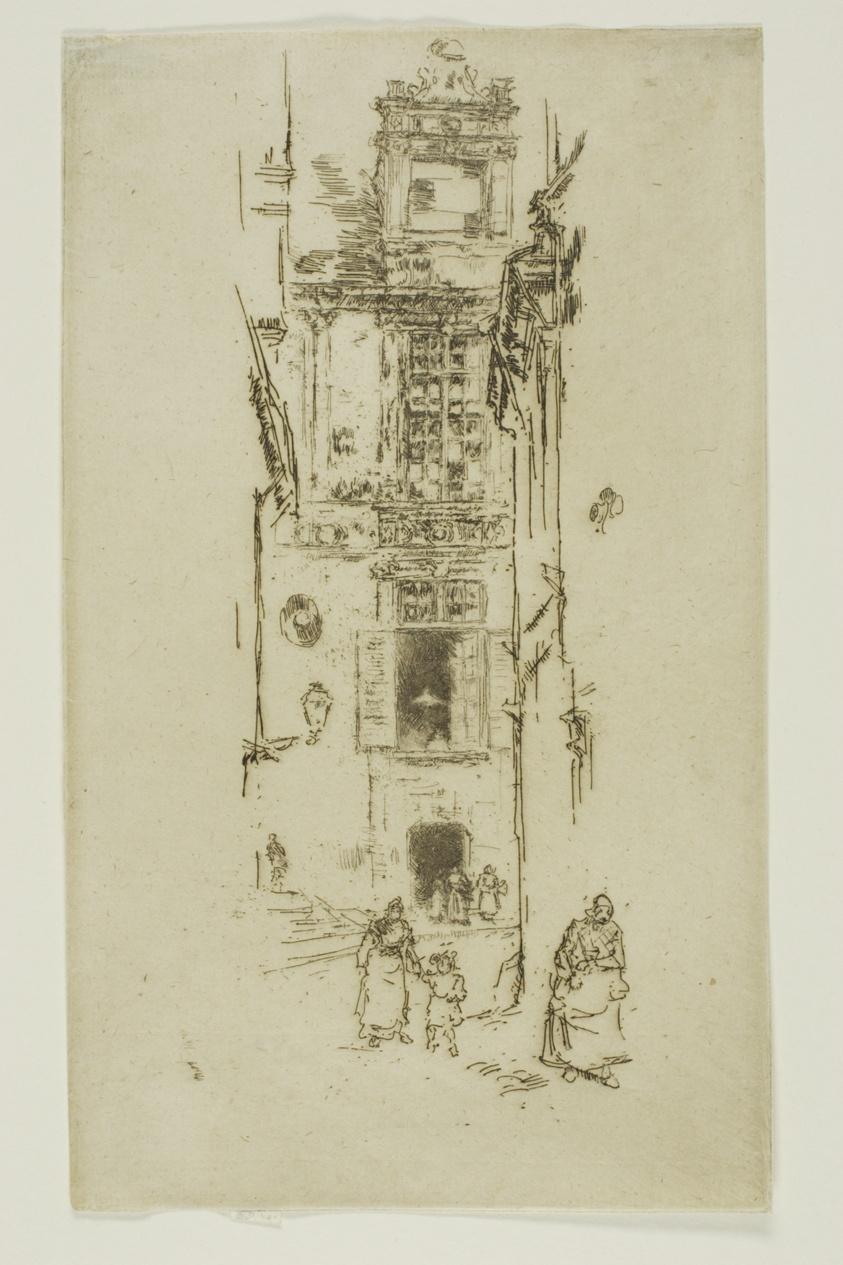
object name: Print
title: Mairie, Loches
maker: James McNeill Whistler (American, 1834-1903)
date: 1888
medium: Etching and drypoint with foul biting in dark brown ink on cream laid paper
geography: United States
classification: etching; foul biting; print; prints and drawing; paper; drypoint